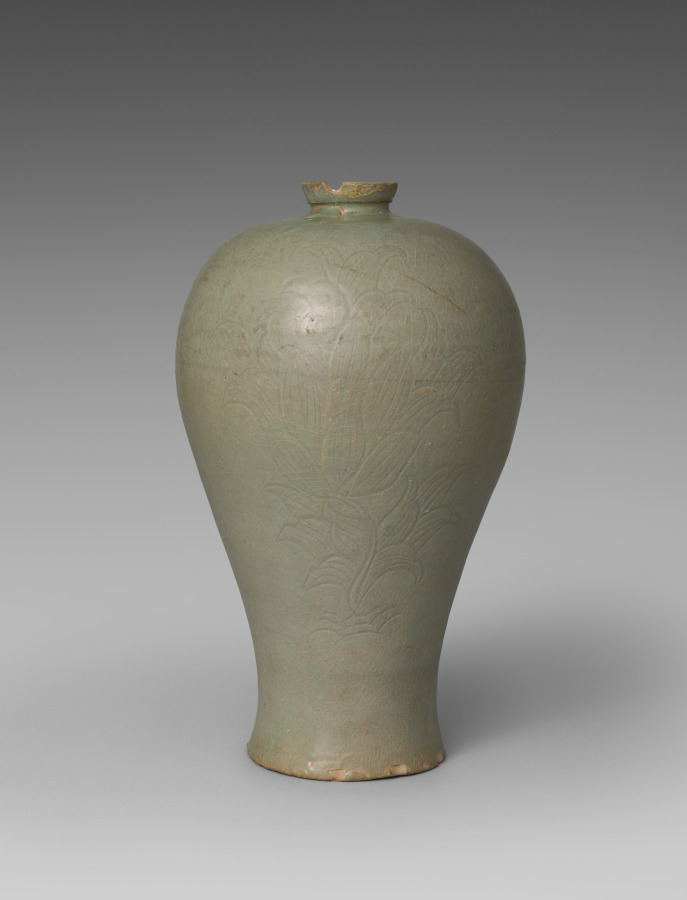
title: Prunus Vase with Incised Peony Design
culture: Korea, Goryeo dynasty (918–1392)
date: 1100s-1200s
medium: celadon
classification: Ceramic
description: As early as the seventh century, the practice of drinking tea and wine became an important part of elite culture in Korea. Once used to store alcoholic beverages, this type of vase features a wide body followed by a sharply rounded shoulder, a short neck and a small opening. Most of the remaining examples no longer have a lid, but originally it may have had a lid that not only covered the opening, but also served as a cup.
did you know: Prunus vases are often believed to contain a branch of plum blossoms, but recent researches reveal that these vases with a lid also were used to contain cooking liquid such as sesame oil.